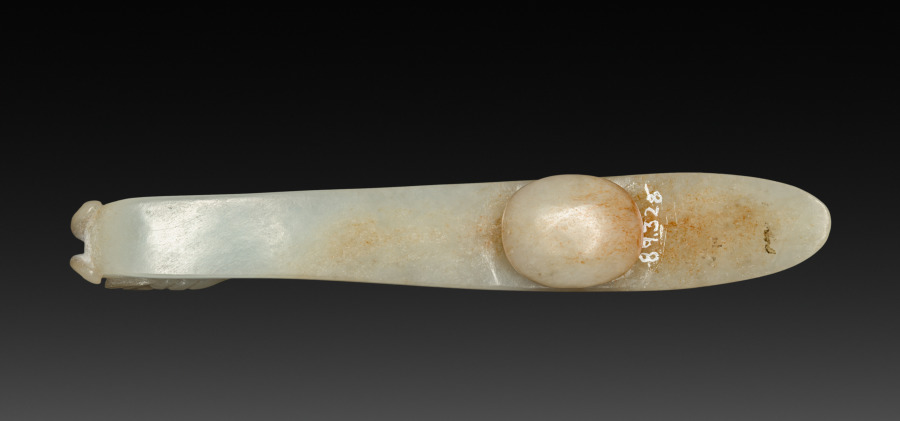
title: Belt Hook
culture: China, Qing dynasty (1644-1911)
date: c. 1700s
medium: jade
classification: Jade